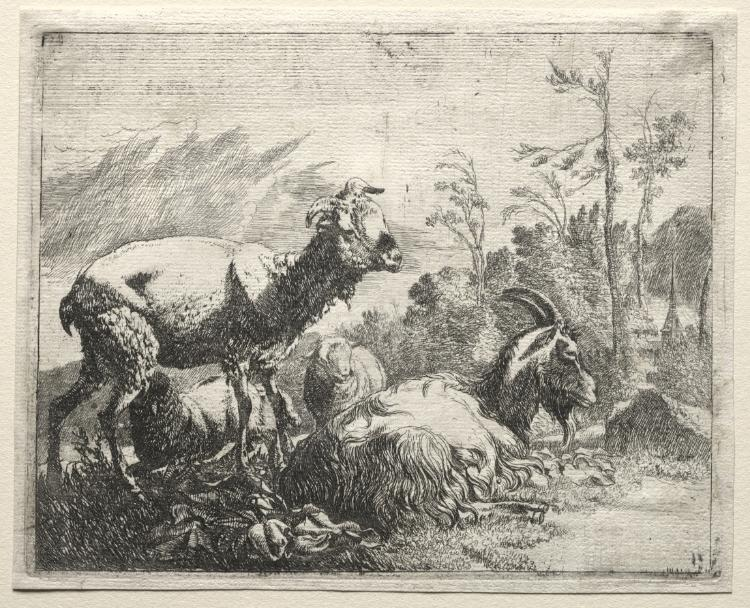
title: Goats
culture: Germany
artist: Johann Heinrich Roos (German, 1631–1685)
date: 1665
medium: etching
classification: Print